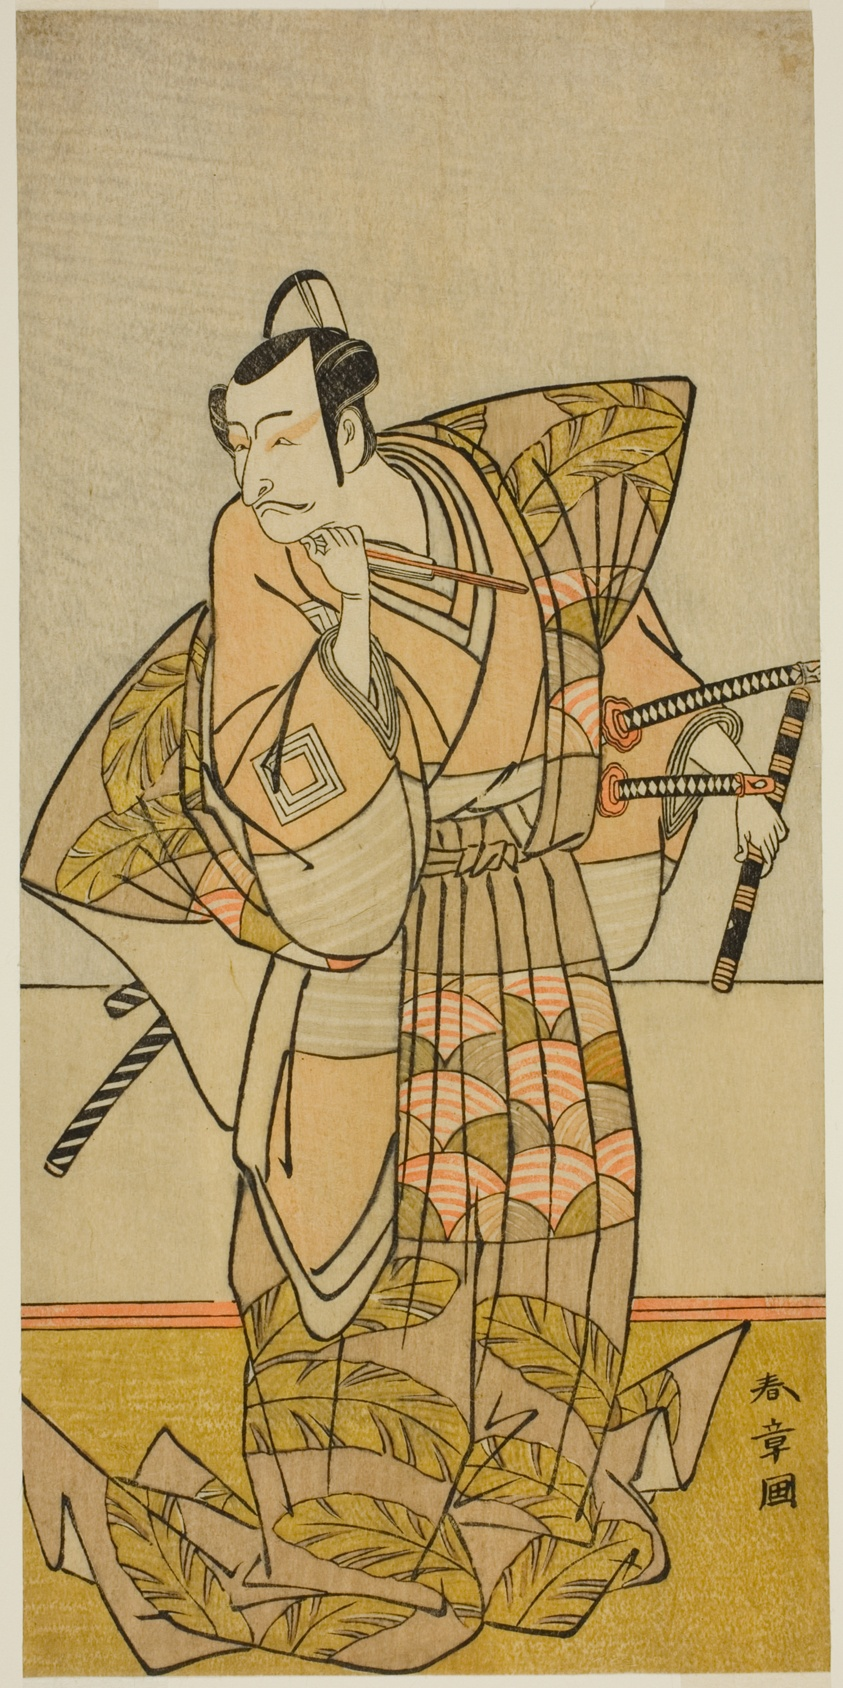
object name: Print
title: The Actor Ichikawa Danjuro V as Chichibu no Shigetada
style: Japanese (culture or style)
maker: Katsukawa Shunsho 勝川 春章; Japanese, 1726-1792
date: c. 1773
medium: Color woodblock print; hosoban; from a multisheet composition (?)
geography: Japan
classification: woodblock print; print; asian art